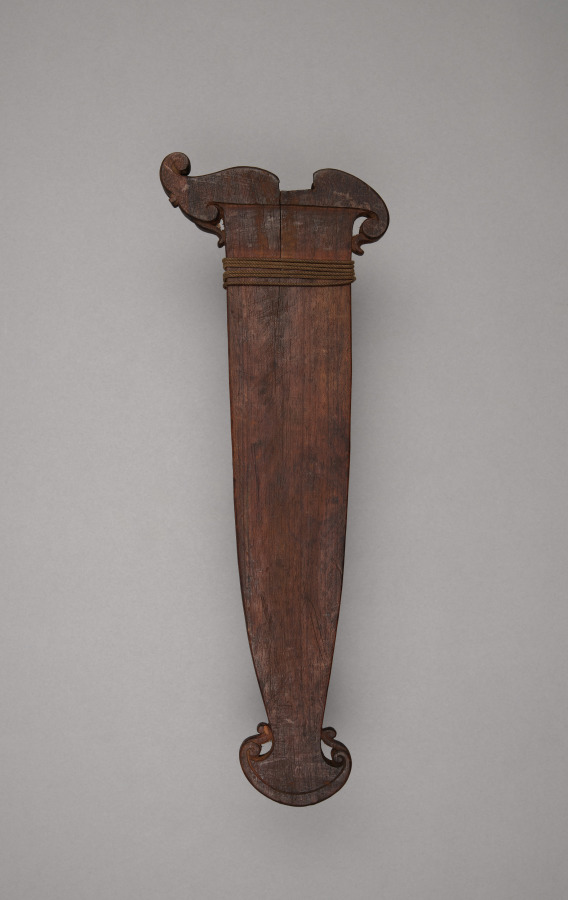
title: Scabbard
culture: Philippines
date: 1800s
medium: Wood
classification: Arms and Armor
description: This scabbard is made from two hardwood pieces, fitted together to hold a barong’s leaf-shaped blade. The rounded tip is minimally ornamented, without the okir scrolls or carved volutes applied to prestige examples. A fiber cord binding secures the upper section and reinforces the join.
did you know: This scabbard is made from dense but lightweight redwood.